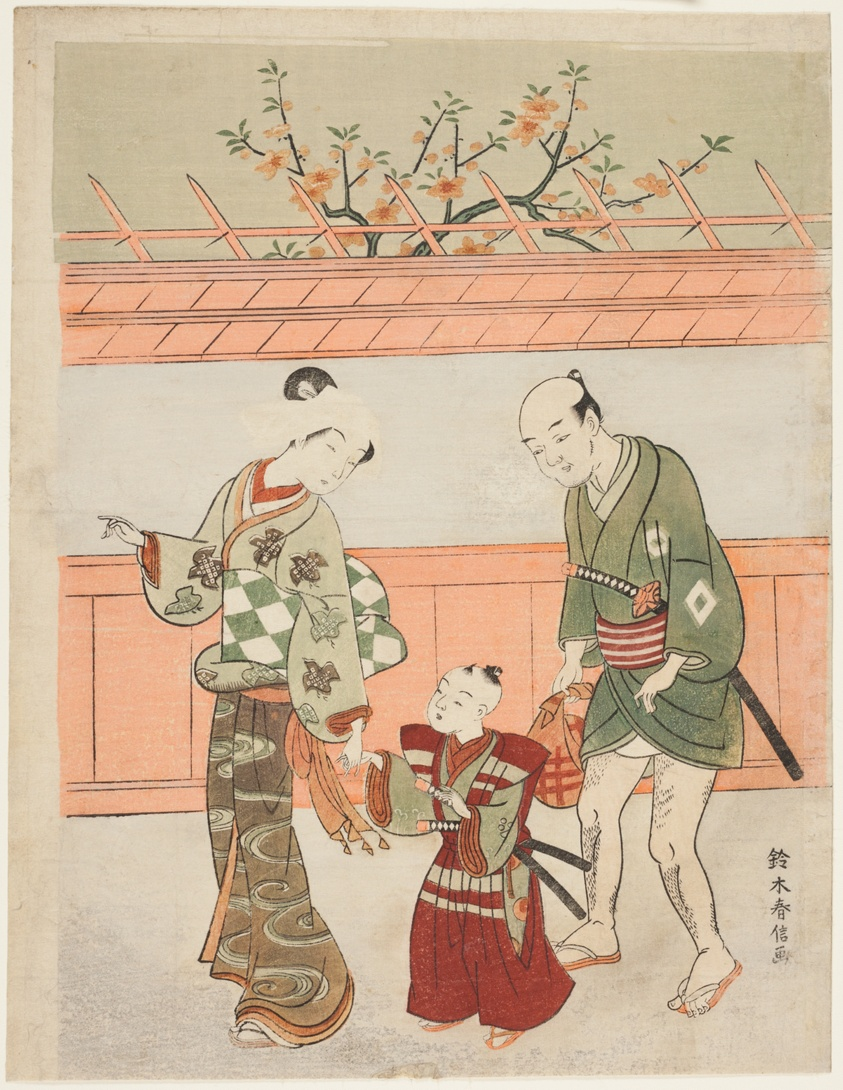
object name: Print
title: A Spring Outing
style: Japanese (culture or style)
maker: Suzuki Harunobu 鈴木 春信; Japanese, 1725 (?)-1770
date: c. 1768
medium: Color woodblock print; chuban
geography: Japan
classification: woodblock print; print; asian art